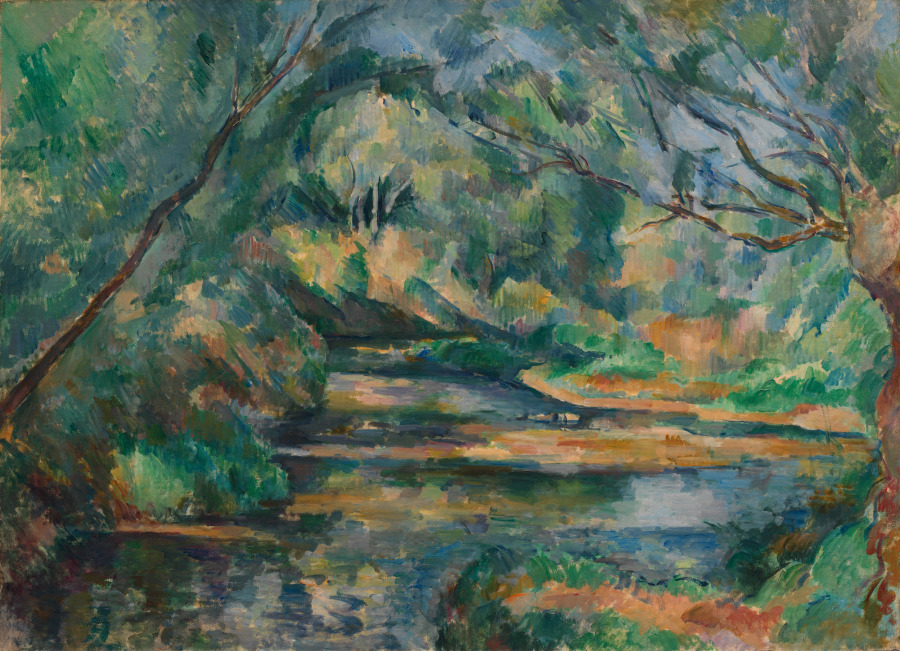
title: The Brook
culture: France, late 19th-early 20th Century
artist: Paul Cezanne (French, 1839–1906)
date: c. 1895–1900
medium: oil on fabric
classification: Painting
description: Although Cezanne exhibited twice with the Impressionists, he rejected his friends’ goals of capturing the fleeting effects of light and atmosphere in their art. Instead, he sought to create balance among the forms and colors in his compositions. This painting depicts the valley of the Arc River that runs southeast of Cezanne’s home in Aix-en-Provence. Throughout the composition, he juxtaposed strokes of different hues, describing the leaves, branches, and the stream with color rather than drawing the outlines of forms.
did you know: Cezanne rarely did preparatory sketches for his paintings. The shapes on the canvas are provided by tonal contrasts and color sensation.